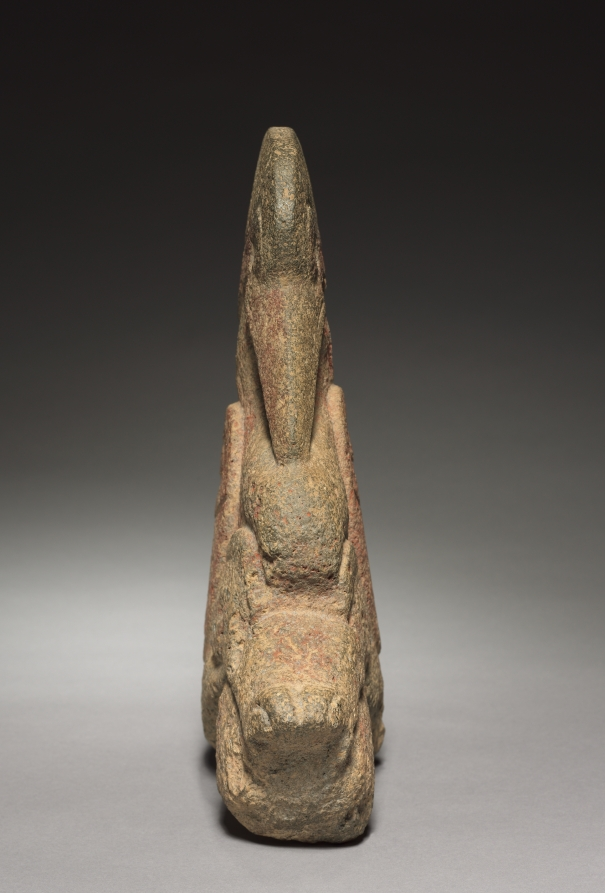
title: Bird Hacha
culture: Mexico, Veracruz, El Tajín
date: 300–900 CE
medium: gray volcanic stone with red pigment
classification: Sculpture